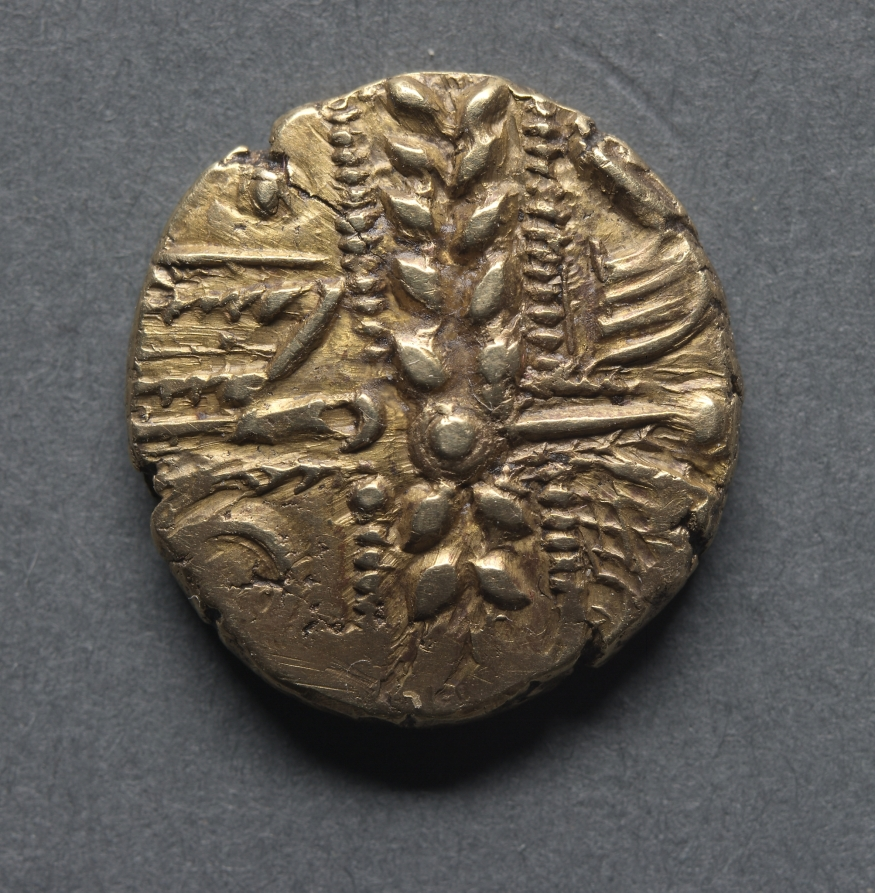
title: Stater: Wreath, Cloak and Crescents (obverse)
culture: England, Catuvellauni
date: c. 60–20 BCE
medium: gold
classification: Coins